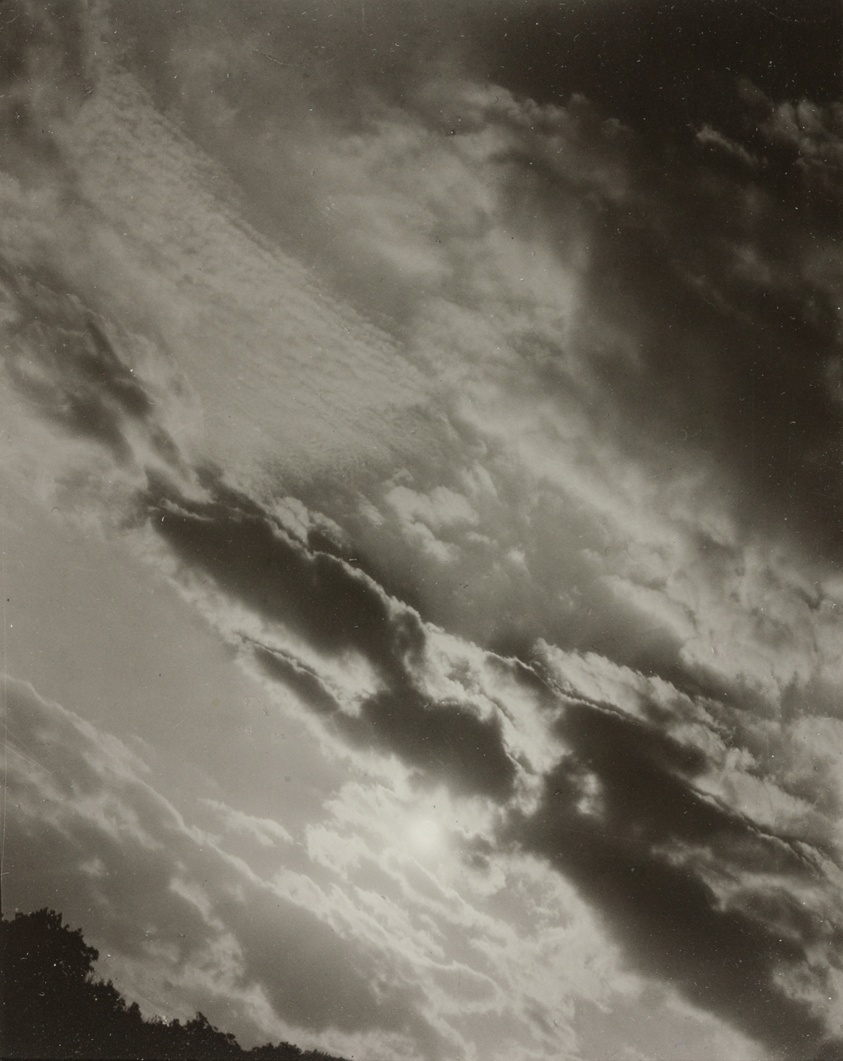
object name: Photograph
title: Equivalent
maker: Alfred Stieglitz (American, 1864–1946)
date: 1923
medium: Gelatin silver print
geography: United States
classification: gelatin silver (developing-out-paper) pr; photographic process; photography; photograph